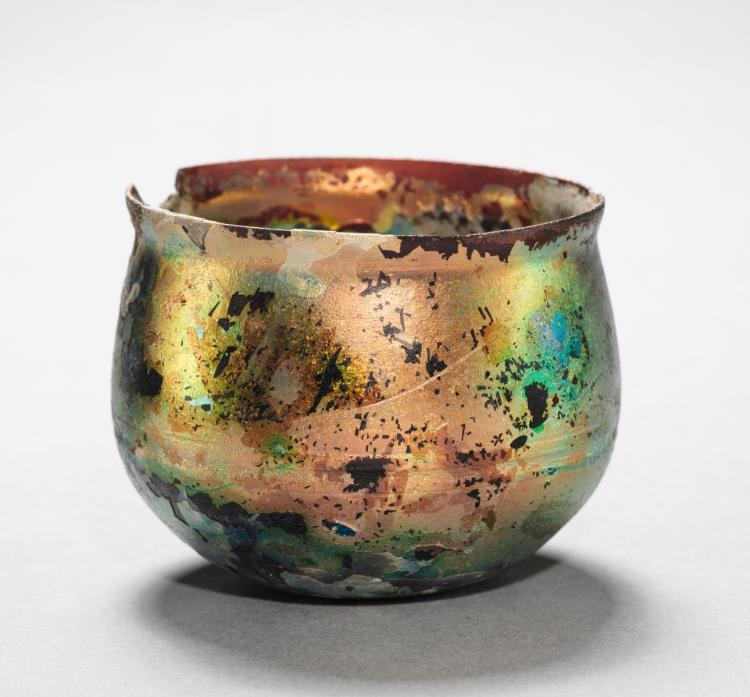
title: Goblet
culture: Italy, Roman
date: 100–300 CE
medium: glass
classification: Glass